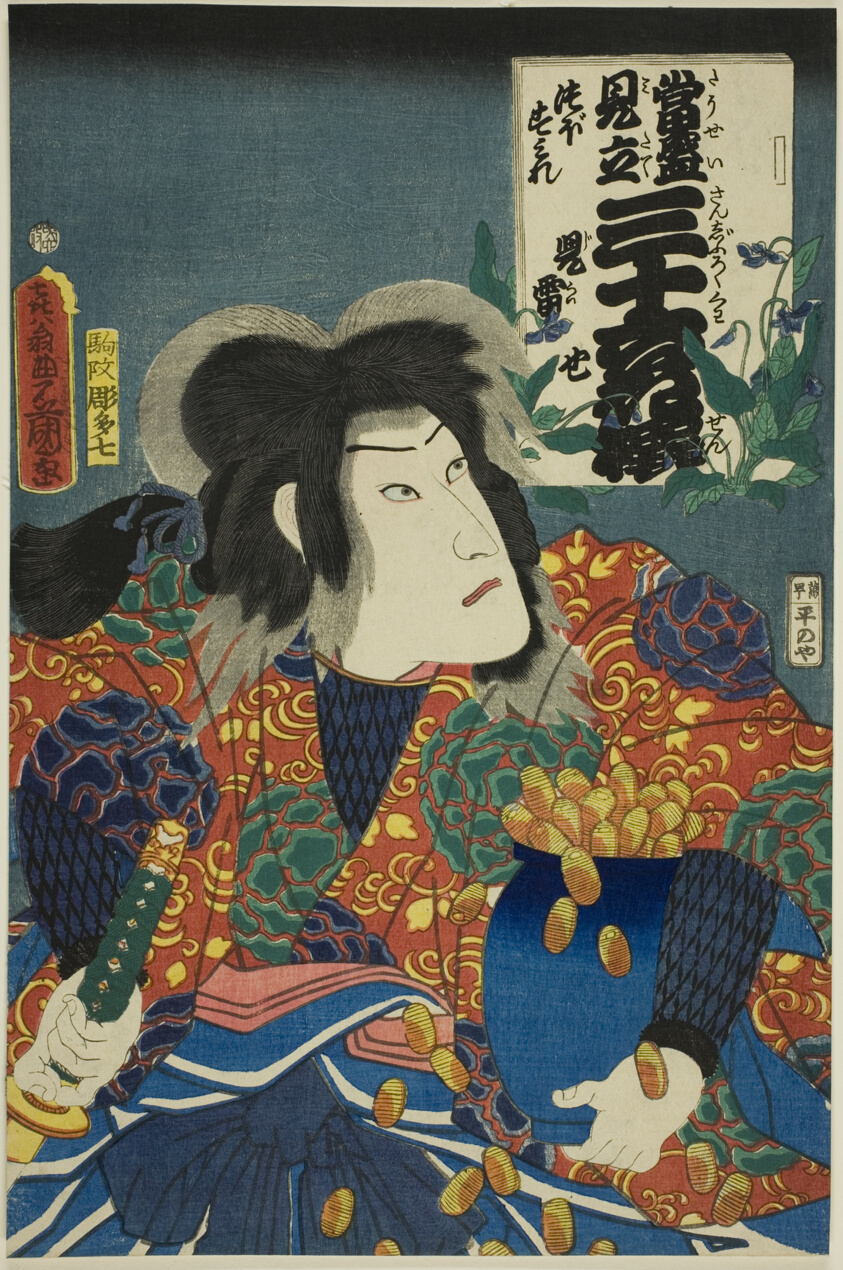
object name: Print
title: Potted Violets: Jiraiya (Tsubo sumire, Jiraiya), from the series "Contemporary Parodies of the Thirty-six Selected Flowers (Tosei mitate sanjurokkasen)"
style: Japanese (culture or style)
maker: Utagawa Kunisada I (Toyokuni III) (Japanese, 1786-1864)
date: 1862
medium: Color woodblock print; oban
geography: Japan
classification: woodblock print; print; asian art